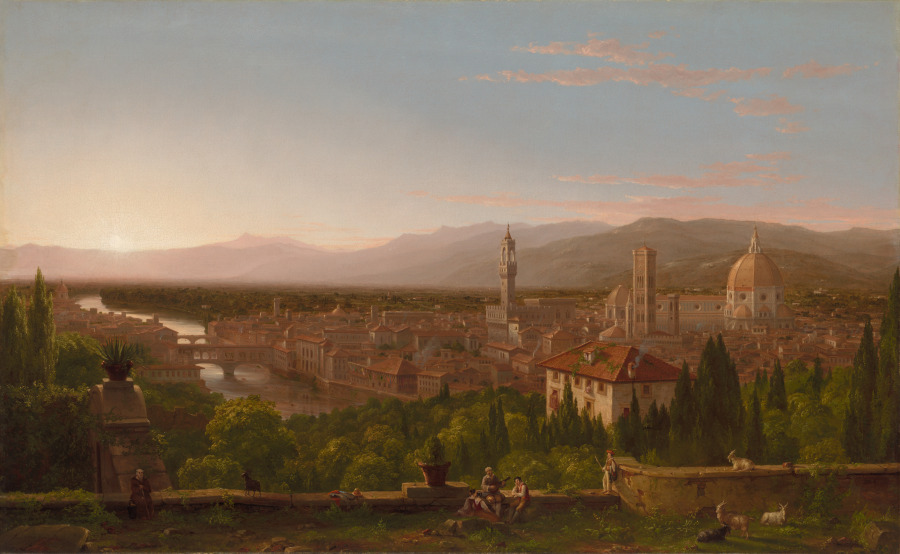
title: View of Florence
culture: America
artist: Thomas Cole (American, born England,1801–1848)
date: 1837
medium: oil on canvas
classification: Painting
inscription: Signed lower right: "T C"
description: Cole visited Italy in 1831 and made a small pencil sketch of this vista of Florence shortly before sunset. In his New York studio six years later, he transformed the drawing into this large oil painting, adding picturesque humans and goats to the foreground. Exhibiting View of Florence alongside a painting of the Catskill Mountains in New York in 1837, Cole set out to prove that he had mastered the very different landscapes of the Old and New Worlds.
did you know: Novelist Henry James grew up with this painting and described its foreground monk as his “constant friend.”